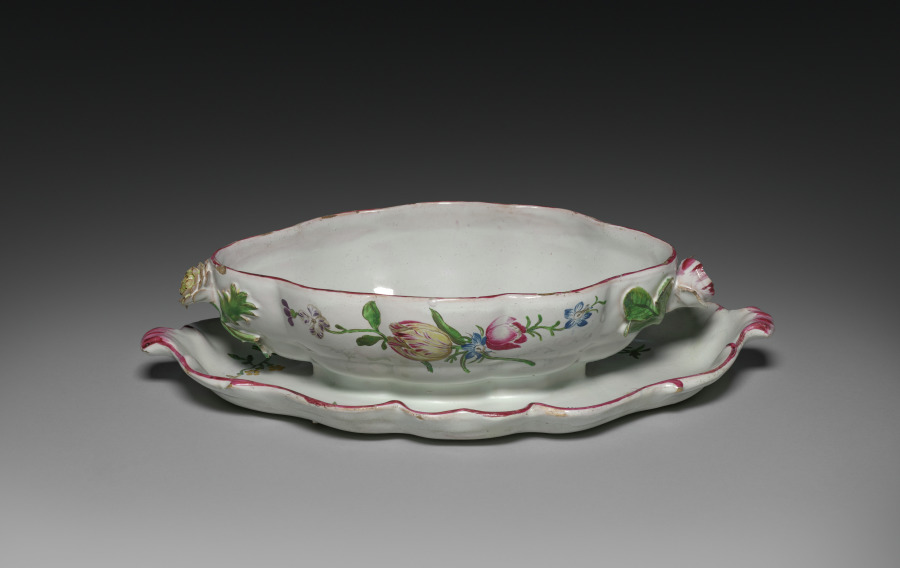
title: Sauce Tureen with Attached Stand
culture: France, Marseilles, 18th century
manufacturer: Veuve Perrin Factory (French)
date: c. 1765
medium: tin-glazed earthenware (faience) with enamel decoration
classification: Ceramic